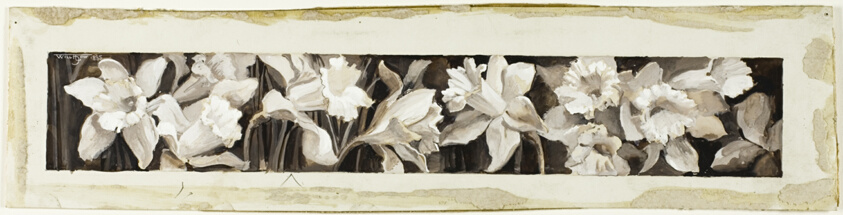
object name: Drawing and Watercolor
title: Decoration - Daffodils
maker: Will Hicock Low (American, 1853-1932)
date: 1885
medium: Brown, gray and white gouache, over traces of graphite, on cream wove card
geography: United States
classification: drawings (visual works); prints and drawing